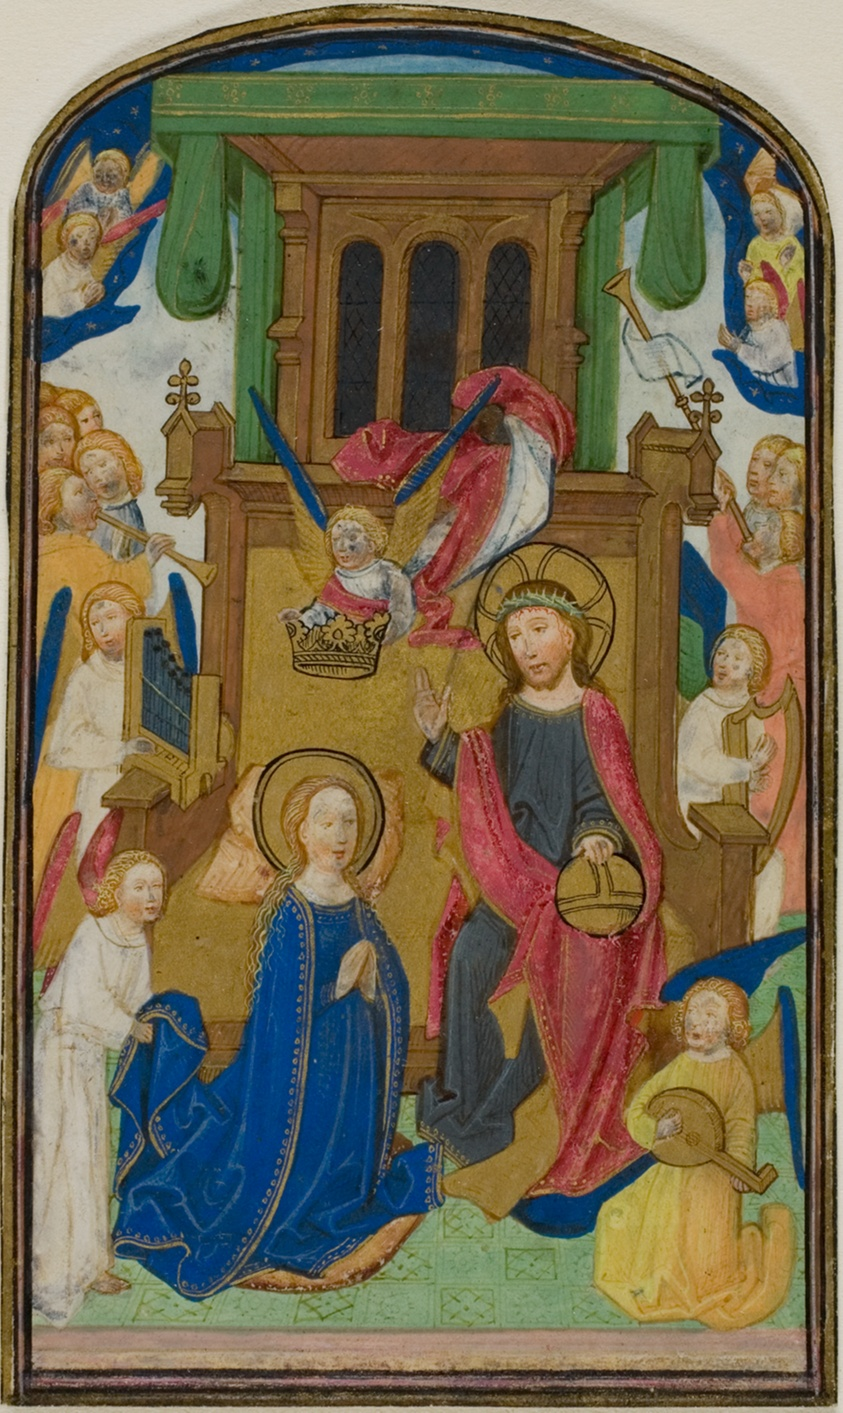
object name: Drawing and Watercolor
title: The Coronation of the Virgin, from a Book of Hours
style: medieval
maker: Attributed to Willem Vrelant or his workshop (Bruges); Netherlandish, flourished 1449-1481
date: 1460/70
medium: Manuscript cutting in tempera and liquid gold on parchment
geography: Netherlands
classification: tempera; manuscript; drawings (visual works); prints and drawing